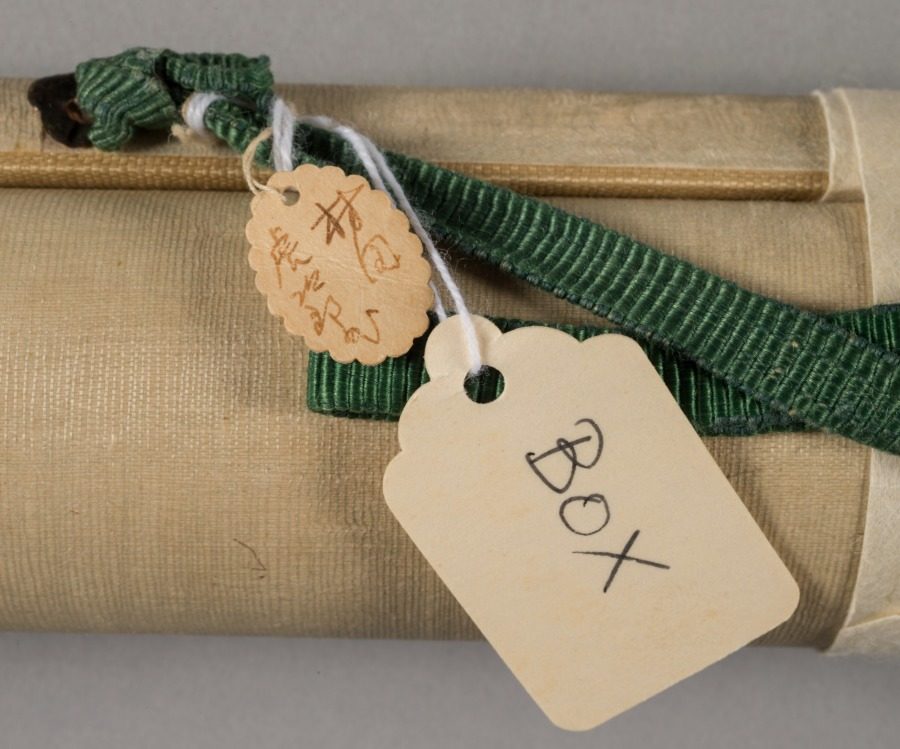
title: Tiger in Wind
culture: Japan, Edo period (1615–1868) to Meiji period (1868–1912)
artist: after Maruyama Ōkyo (Japanese, 1733–1795)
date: 1800s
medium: hanging scroll; ink on paper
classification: Painting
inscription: 「秋空一鶴」賛 長嘯一聲風括地「月渚」朱文方印「祐常之章」白文方印 壬辰初冬寫応挙 「應舉之印」白文方印・「仲選」白文方印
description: The seals appended to the inscription on this painting suggest that the text was brushed by Yūjō (1723–1773), an imperial prince who became a Buddhist monk and was abbot of Enman'in at Miidera. The line is from a poem attributed to a Yuan dynasty poet, Yu Ruyu (dates unknown), and describes the sound of a fierce wind lashing the ground. Wind is associated with the roar of the tiger. Yūjō was Maruyama Ōkyo's most important patron as a young artist, and this painting has a signature asserting that Ōkyo created it in 1772, the year before Yūjō's death. While Yūjō produced a preface for a now famous set of handscrolls he commissioned Ōkyo to paint, and a number of Ōkyo's compositions for Enman'in survive, this work would appear to be one imagining their relationship, as opposed to a genuine piece.